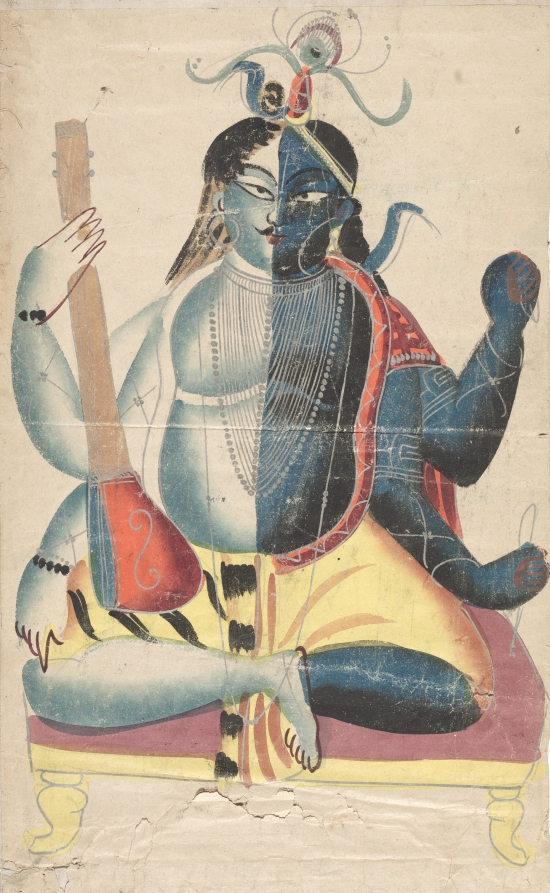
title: Hari-Hara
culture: Eastern India, Bengal, Kolkata, Kalighat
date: c. 1890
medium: Gum tempera, graphite, ink, and tin on paper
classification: Painting